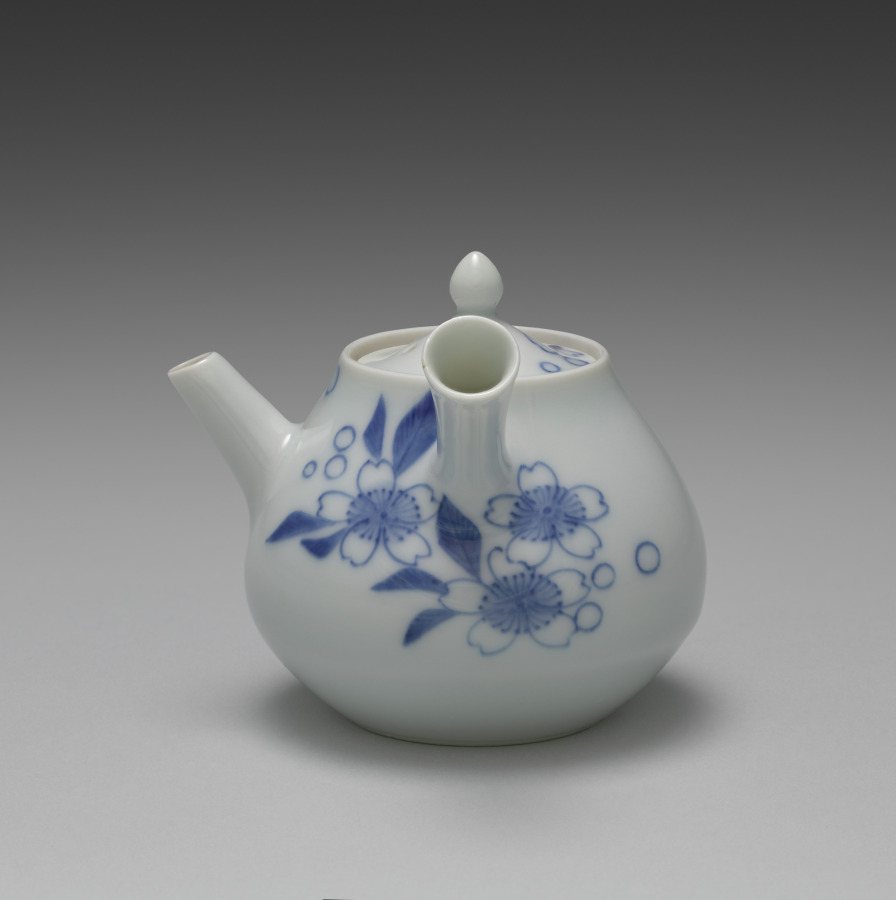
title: Teapot with Cherry Blossoms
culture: Japan, Taishō period (1912–26) or Shōwa period (1926–89)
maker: Seifū Yohei IV (Japanese, 1872–1951)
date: 1914–46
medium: Porcelain with underglaze blue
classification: Ceramic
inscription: 清風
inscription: 清風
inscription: 清風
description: This teapot with mountain cherry blossom motifs has its design in underglaze cobalt blue. It runs over both the pear-shaped body and the recessed lid, with its pointed, jewel-shaped handle. There is a faint bluish-green tint to the glaze. The mark impressed into the base of this work appears to be one used by Yohei III. However, the box inscription is brushed in a hand matching that of Yohei IV, and while the seal on the lid is one often used by Yohei III, that next to the signature on the back of the lid is one generally used by Yohei IV. The signature, too, resembles others belonging to Yohei IV. As the design, technique, and object named on the box accurately describe the contents, it seems unlikely, but not impossible, that it is mismatched. There are many cases in which Yohei III works are contained in boxes with inscriptions, seals, and a signature by Yohei IV. However, in such examples, Yohei IV clearly identifies himself as authenticating the work of his father and often includes his father’s Imperial Household Artist seal. This may be an example of a transitional piece in which Yohei IV has used his father’s mark on the base of his own work.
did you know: Cherry blossoms mark the arrival of spring, and their short-lived beauty is deeply anticipated and appreciated.